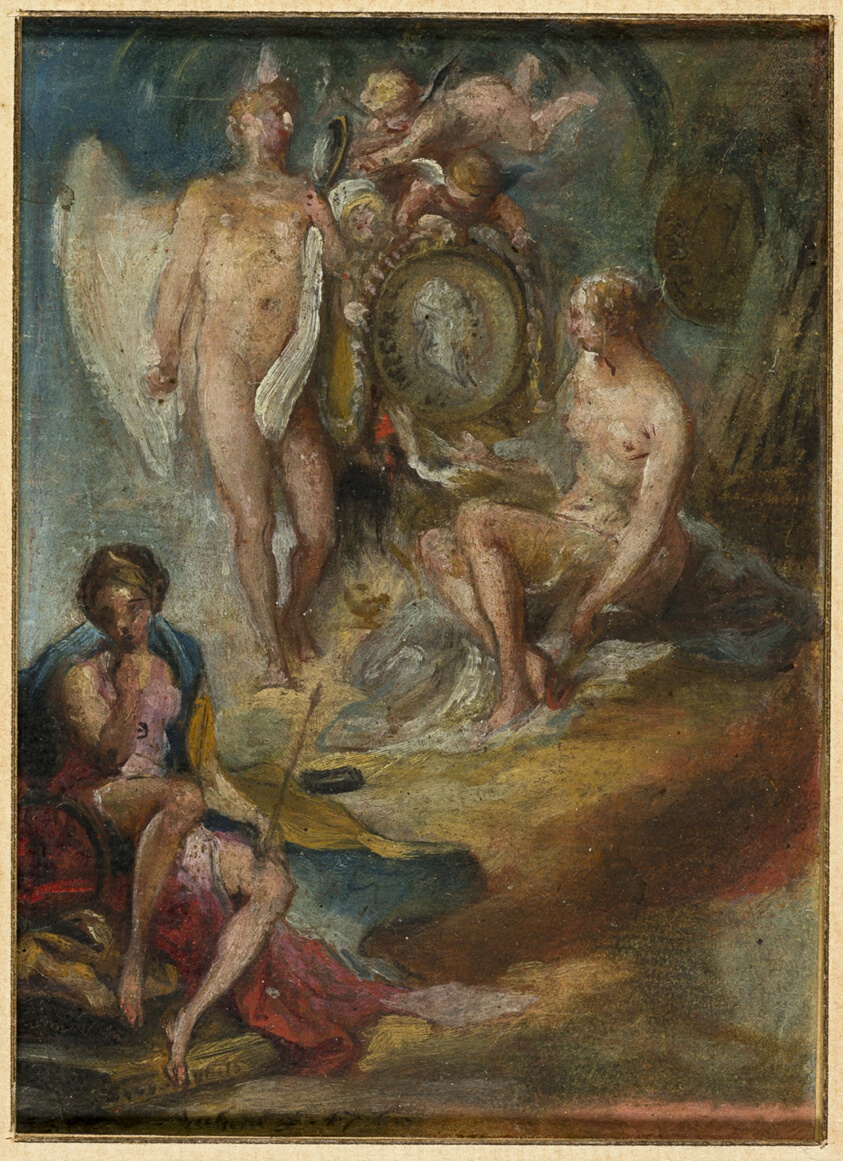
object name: Drawing and Watercolor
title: Allegory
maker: Gabriel Jacques de Saint-Aubin (French, 1724-1780)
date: 1770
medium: Oil, with touches of black chalk, on tan laid paper, tipped on beige wove paper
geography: France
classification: oil on paper; drawings (visual works); prints and drawing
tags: women, people, prints and drawings, putti, triangles